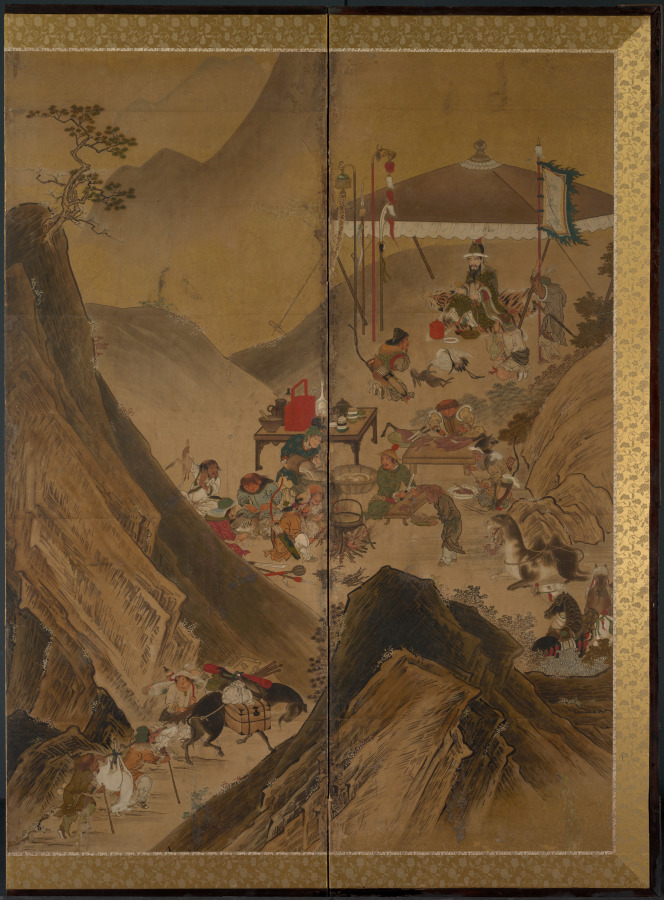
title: Tartars Hunting in a Mountain Landscape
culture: Japan, Edo period (1615–1868)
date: first half of 1600s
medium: six-panel folding screen; ink, color, and gold on paper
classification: Painting